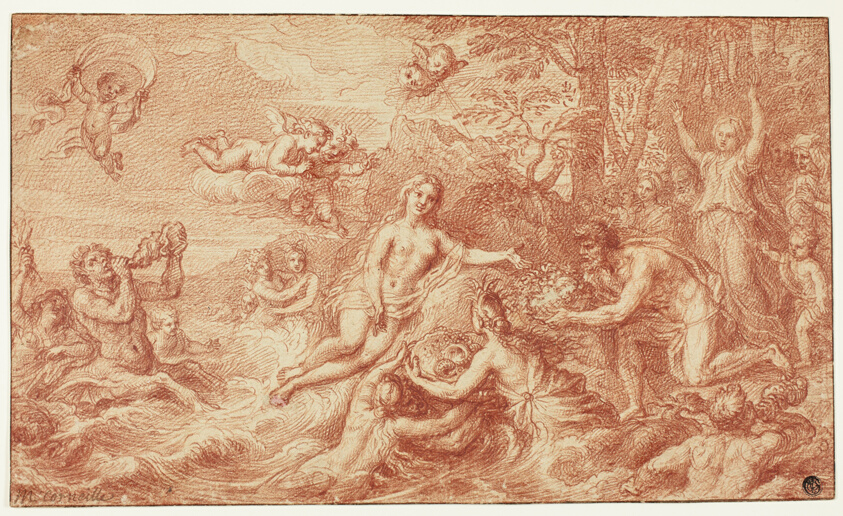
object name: Drawing and Watercolor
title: Birth of Venus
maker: Michel Corneille, the Younger; French, 1642–1708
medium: Red chalk, on buff laid paper, laid down on cream laid paper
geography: France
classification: chalk; drawings (visual works); prints and drawing